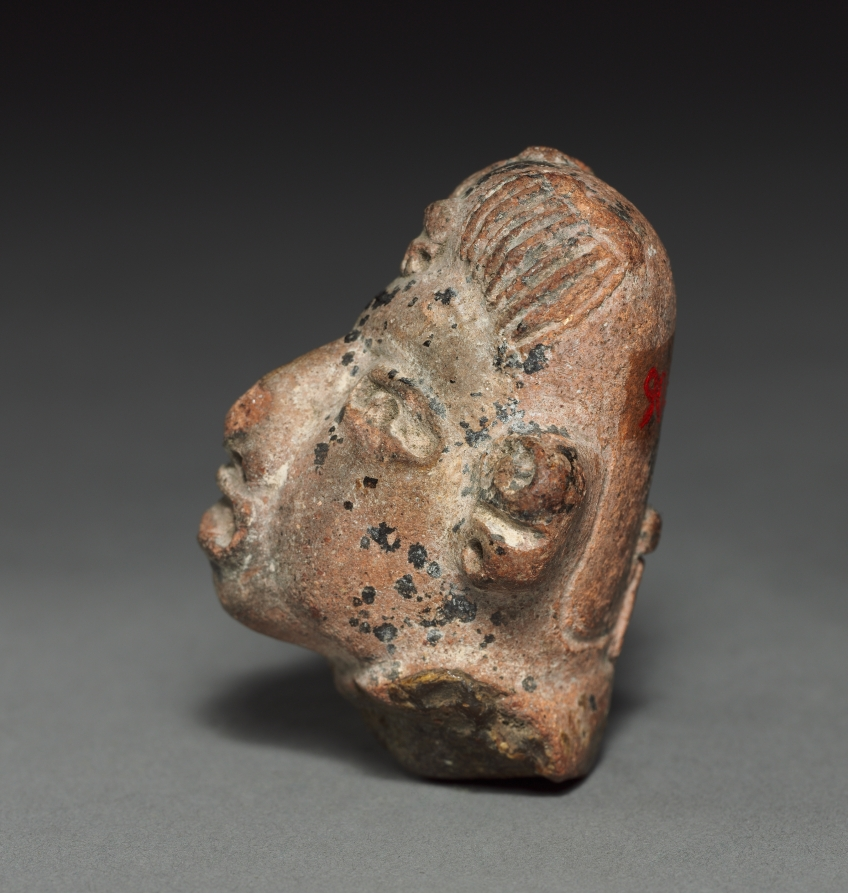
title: Figurine Head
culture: Mexico or Central America, Maya(?)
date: 100 BCE–300 CE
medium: pottery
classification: Sculpture